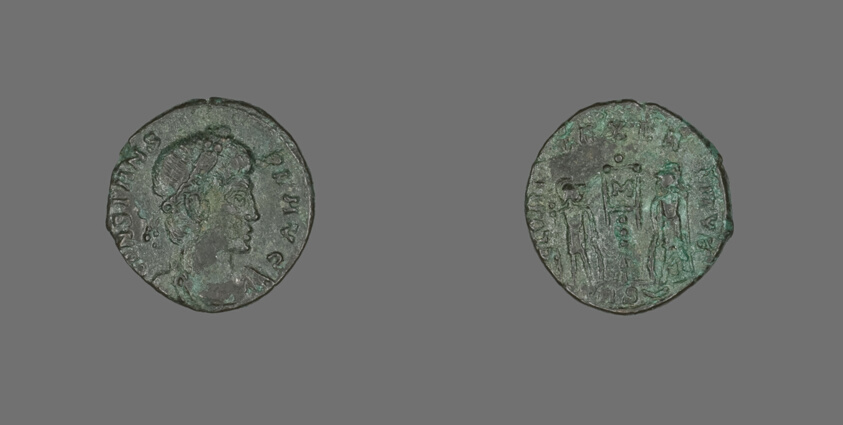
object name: Coin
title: Coin Portraying Emperor Constans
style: roman (ancient, style or period), ancient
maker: Roman, minted in Trier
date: after April 340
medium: Bronze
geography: Roman Empire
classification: coin; ancient art